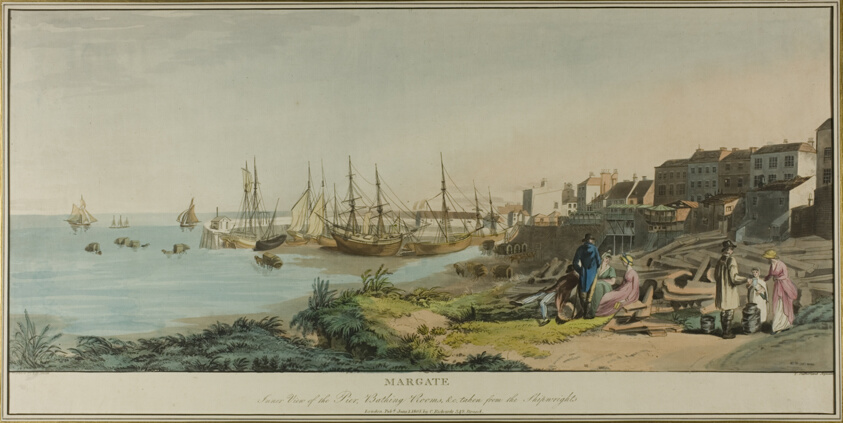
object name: Print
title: Margate, Inner View of the Pier, Bathing Rooms, and taken from the Shipwrights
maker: John Raphael Smith (English, 1751-1812); acquaint by Thomas Sutherland (English, c. 1785-1838); published by Charles Richards (English, active 1804-1806)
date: published June 1, 1805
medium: Hand-colored etching and acquaint on ivory wove paper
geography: England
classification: aquatint; print; prints and drawing